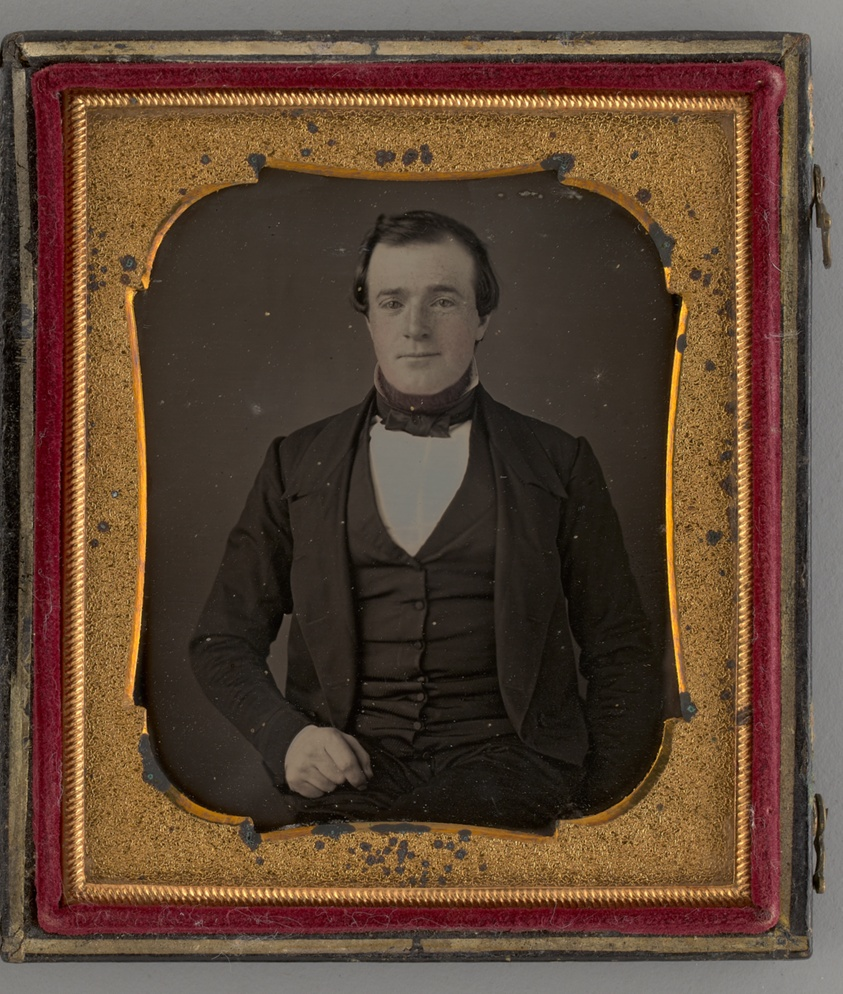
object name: Photograph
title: Untitled (Portrait of a Man)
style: 19th century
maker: Unknown maker; American, 19th century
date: 1853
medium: Daguerreotype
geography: United States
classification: portrait; photograph; photographic process; photography; portrait; daguerreotype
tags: lundberg collection, portraits, portraits: male subject, Male, photography, portrait